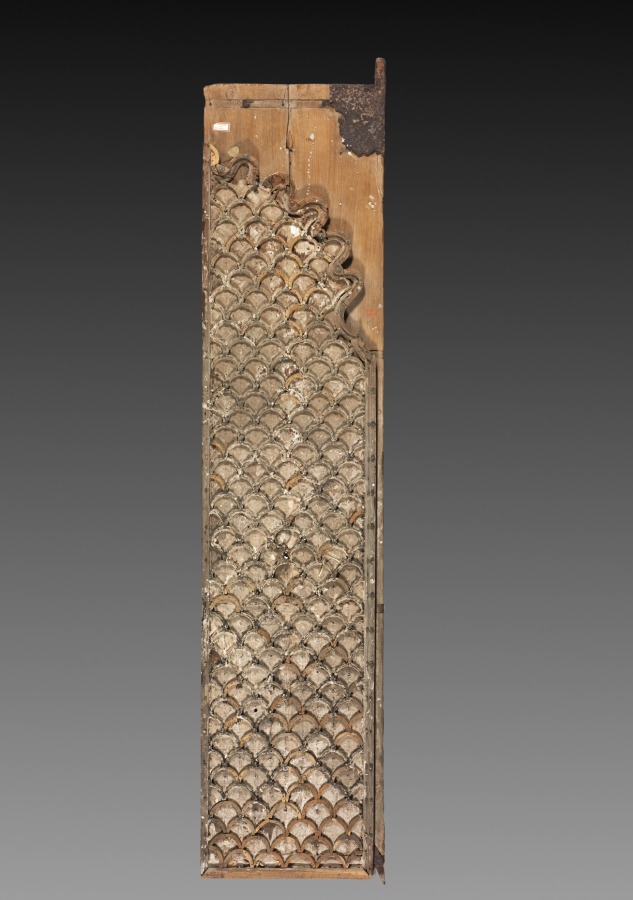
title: Painted Door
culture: Northwestern India, Rajasthan, possibly Rajput kingdom of Bundi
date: c. 1820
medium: color on wood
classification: Painting